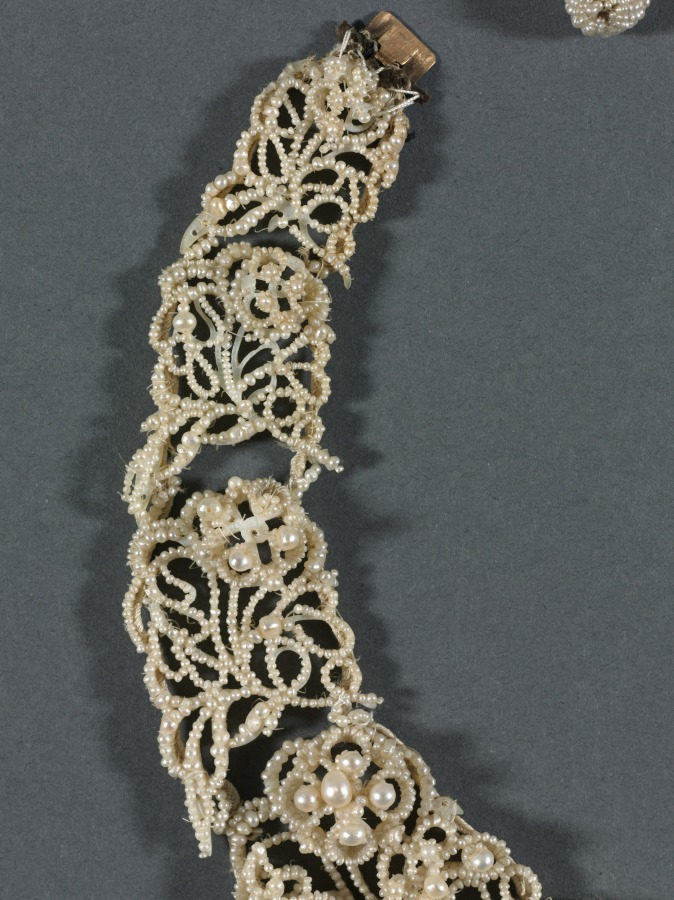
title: Necklace (Parure)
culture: England, 19th century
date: c. 1850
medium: seed pearl on Mother-of-Pearl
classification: Jewelry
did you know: A parure is a set of various items of matching jewelry popular in Europe in the early 1800s; they could include a variety of pieces such as a necklace, earrings, brooch, bracelet, or tiara.